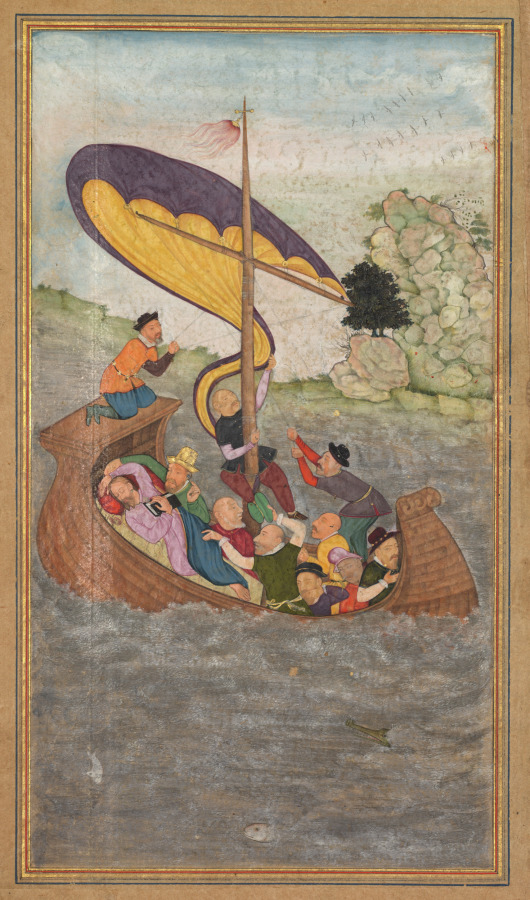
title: Jesus being awakened during a tempest on the Sea of Galilee (folio 77 recto), from a Mirror of Holiness (Mir’at al-quds) of Father Jerome Xavier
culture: Mughal India, Allahabad, made for Prince Salim (1569–1627)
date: 1602–4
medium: Gum tempera, ink, color, and gold on paper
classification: Manuscript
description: The boat carrying Jesus and his apostles encountered a tempest on the Sea of Galilee. As the apostles began to panic and fear that their boat would sink, Jesus continued to sleep peacefully. The painter illustrates the moment before Jesus was awakened by his apostles, who are frightened by the storm and perhaps also by the crocodile that sticks its head out of the waves. The power of the gale is indicated by the violently twisting sail and the Mughal-style tassel that swings at the top of the mast. This composition is the only one in the Cleveland manuscript to be based on an identifiable European print.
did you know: The apostle wearing green appears to be seasick.